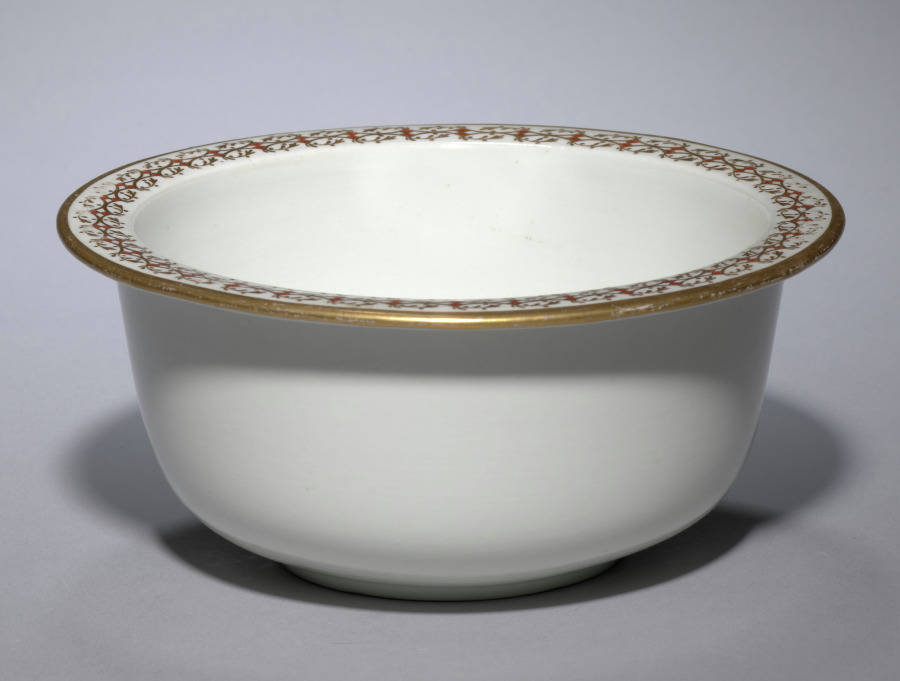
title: Liner for an Ice Pail (2 of 2)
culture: England, late 18th-early 19th Century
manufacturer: Flight & Barr (British)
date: c. 1792–1804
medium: porcelain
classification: Ceramic